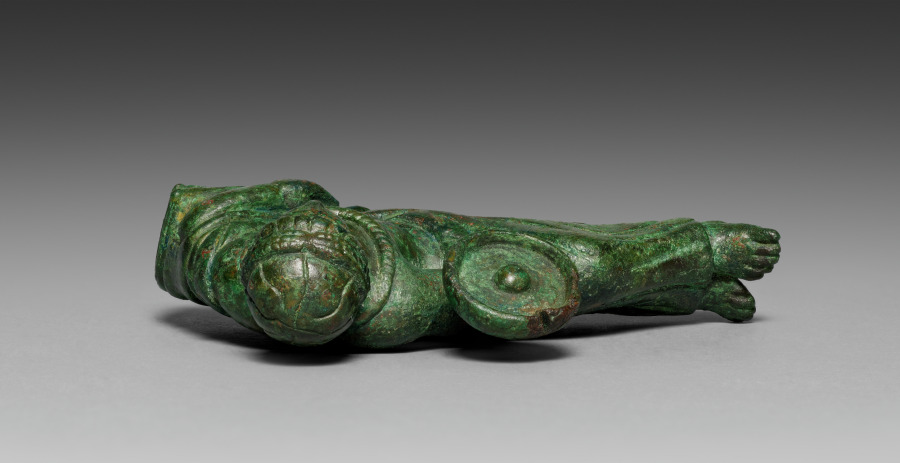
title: Vessel Ornament of Banqueter Holding an Omphalos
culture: Etruscan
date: probably 400–375 BCE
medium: bronze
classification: Sculpture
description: This bronze banqueter figurine was one of six once adorning the rim of a large basin, now lost. Cast in molds with individualized details, most have grooves on their underside to attach to the basin. Minute traces of gilding remain on areas of clothing and skin (mostly visible only under magnification), suggesting that they may have been completely gilded. Two handles in the form of hippocampi, horses with serpentine tails, also belonged to the basin and are now displayed at the Michael C. Carlos Museum at Emory University. The basin may have been used to hold liquid for a banquet, or was perhaps funerary. This bronze figurine holds a phiale mesomphalos, a shallow wine bowl, in his right hand. The vessel is tilted upward as if to spill its contents, perhaps as a libation for the gods. Traces of gilding remain in the corners of the phiale mesomphalos and the figurine’s drapery. His left hand rests against a fold of cloth slipping over his shoulder. A garland lies on his bare chest and another crowns his head. The banqueter shares many similarities with 1987.158.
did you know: Though primarily associated with dedicatory libations, the phiale mesomphalos could also be used for drinking.